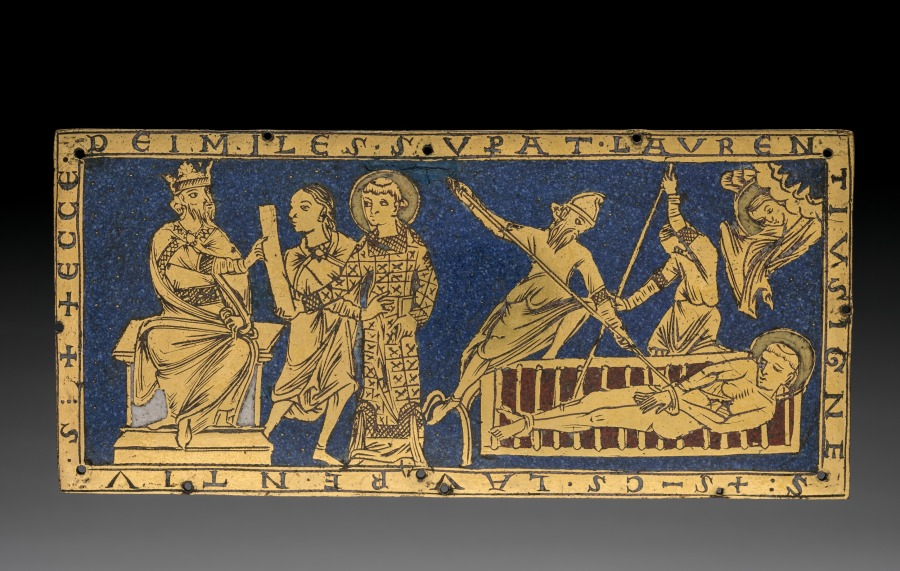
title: Condemnation and Martyrdom of Saint Lawrence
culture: Germany, Lower Saxony, Hildesheim?, Romanesque period, 12th century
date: c. 1180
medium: gilded copper, champlevé enamel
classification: Enamel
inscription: running inscription on the borders: ECCE / DEI MILES SVP(er)AT LAVREN/TIVS IGNE/S (Behold, the warrior of God overcomes the flames) S(an)C(tu)S LAVRENTIV/ S.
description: Champleve enameling is a process in which the artist carves designs into copper plates, and then powdered glass is applied before firing in a furnace, causing the glass to fuse into enamel. In this case, the copper was then gilded and polished. This type of enameling is still done today, mostly for jewelry and decorative items.